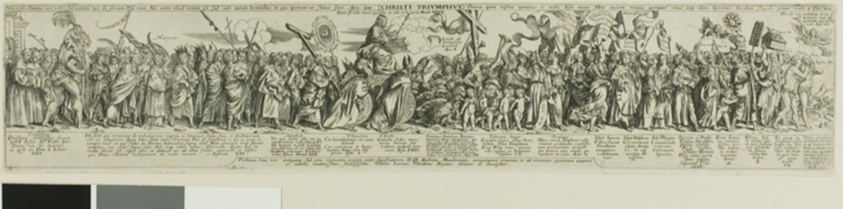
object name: Print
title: The Triumph of Christ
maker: Johann Theodor de Bry (German, 1561-1623); after Titian (Italian, c. 1488-1576)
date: c. 1600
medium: Engraving in black on ivory laid paper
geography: Germany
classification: engraving; print; prints and drawing